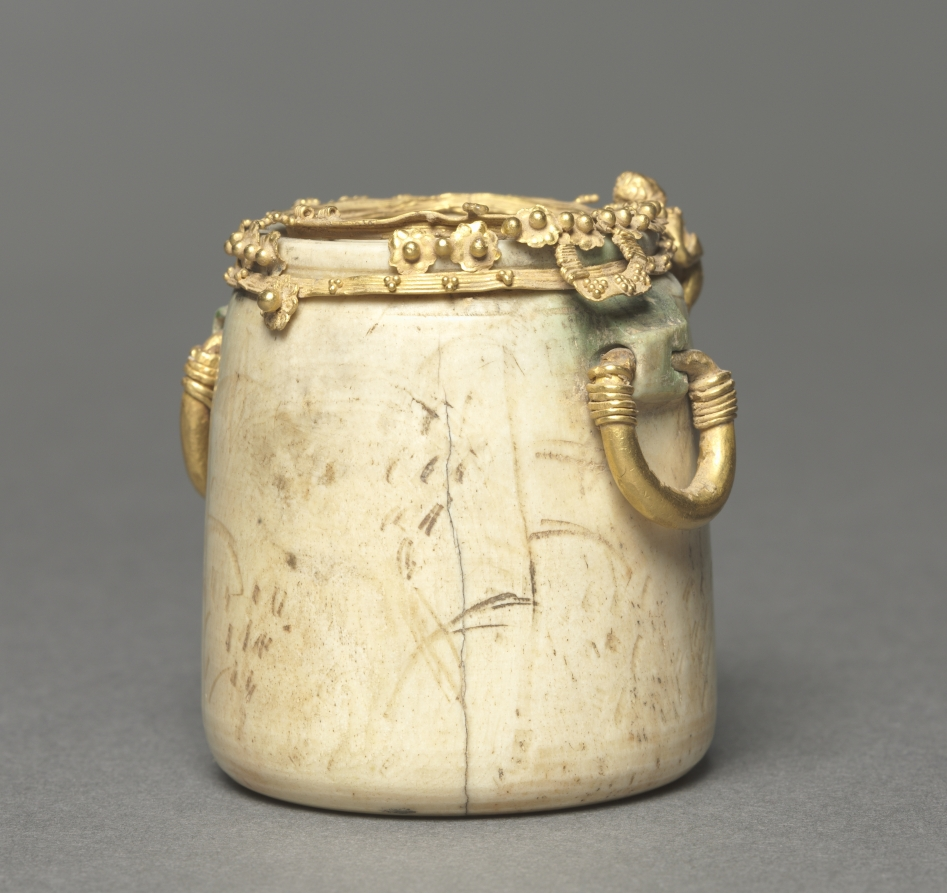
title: Cosmetic Jar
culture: Byzantium, probably Syria, early Byzantine period, 6th century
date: 500–550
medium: ivory and gold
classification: Metalwork